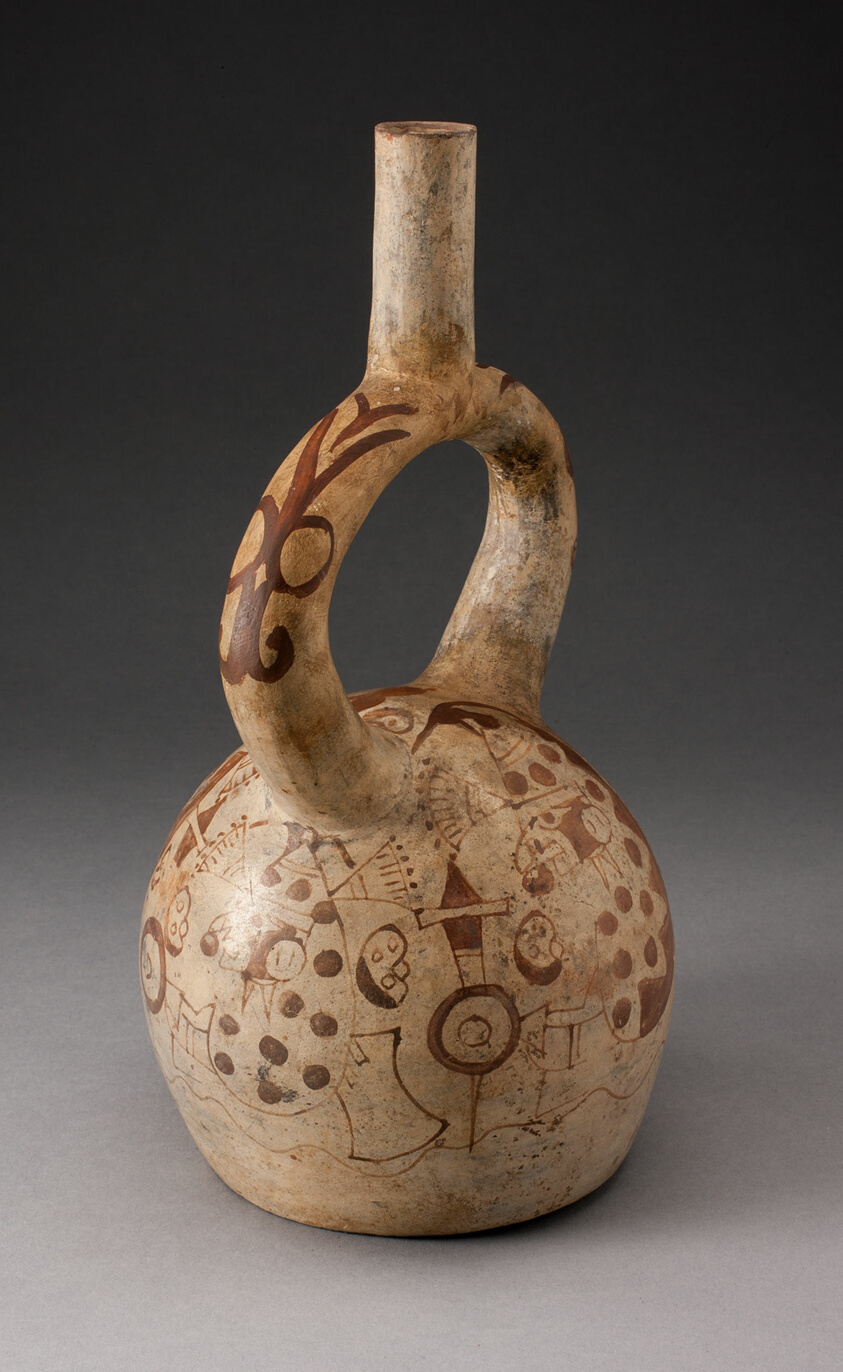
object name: Vessel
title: Stirrup Spout Vessel with Fineline Bean Warrior Motif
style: moche, Arts of the Americas, andes, south american, andean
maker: Moche (North coast, Peru)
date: 100 BCE–500 CE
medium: Ceramic and pigment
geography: Peruvian North Coast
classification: earthenware; ceramics; vessel; art of the americas